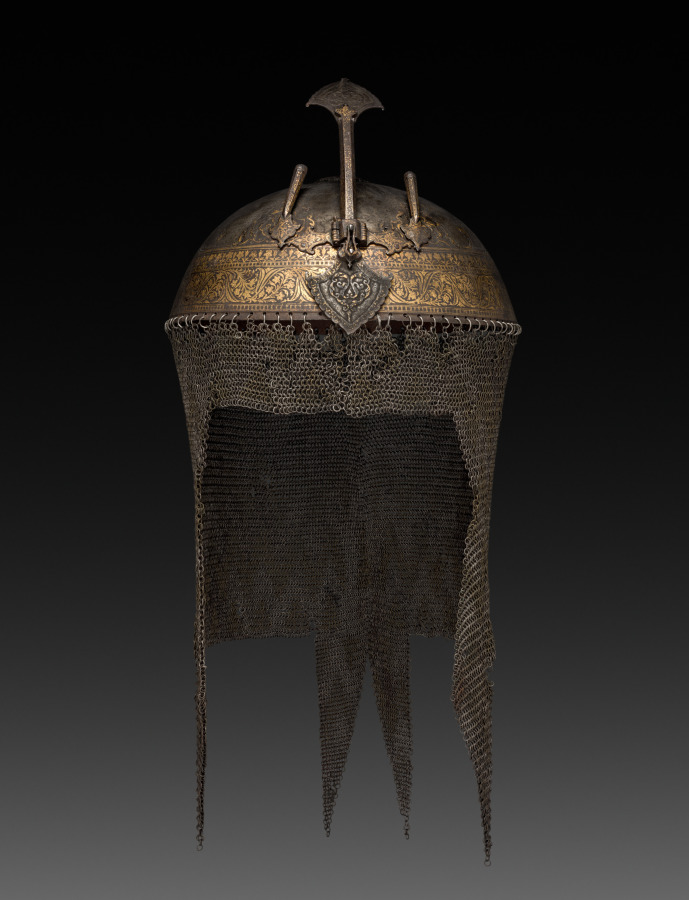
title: Helmet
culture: North India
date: 1600s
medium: steel with gold and brass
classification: Arms and Armor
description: Mughal soldiers wore hemispherical steel helmets to battle. This helmet’s surface features decorative floral patterns created using a process called damascening, in which gold wire was hammered into steel grooves. A leaf-shaped guard slides down in front of the nose for protection. The short tubes on either side of the nasal guard were for holding plumes, most popularly black heron feathers or white aigrettes. The spike that would have been on the apex has broken off. Also missing is the stuffed cotton padding that lined the interior. Chain mail made up of interlocking steel wire rings protected the ears, neck, and shoulders.